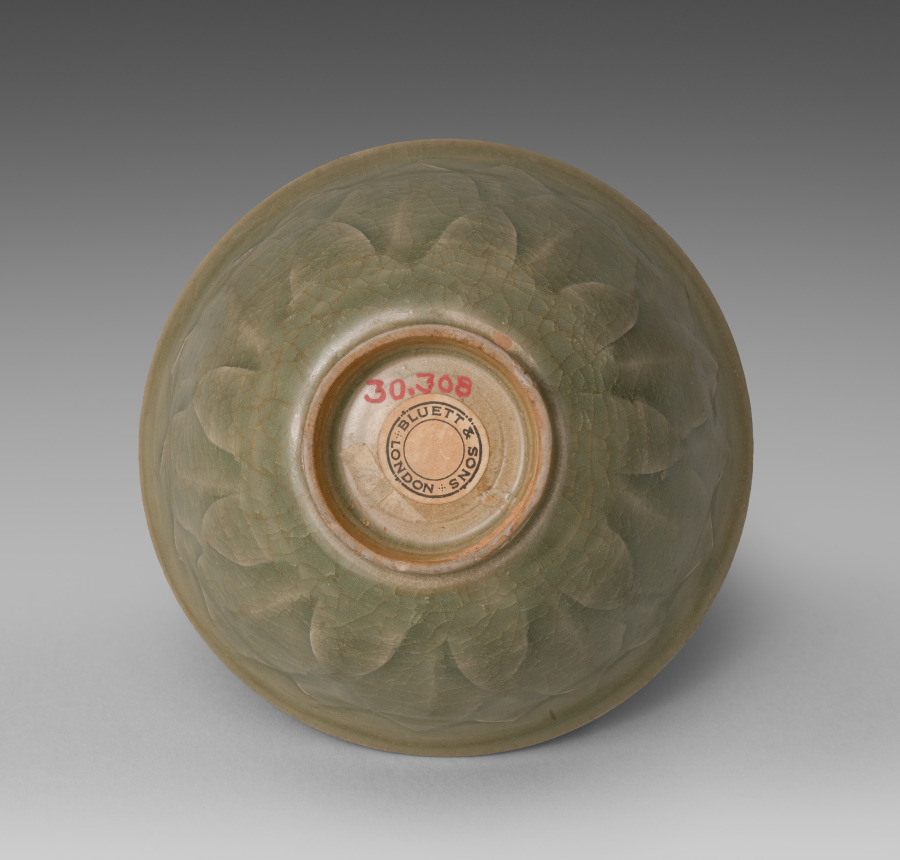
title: Bowl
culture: China, Northern Song dynasty (960–1127)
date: 1000s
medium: glazed stoneware; Northern Celadon ware, Yaozhou type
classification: Ceramic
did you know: Overlapping lotus petals cover the exterior walls of this deep bowl.